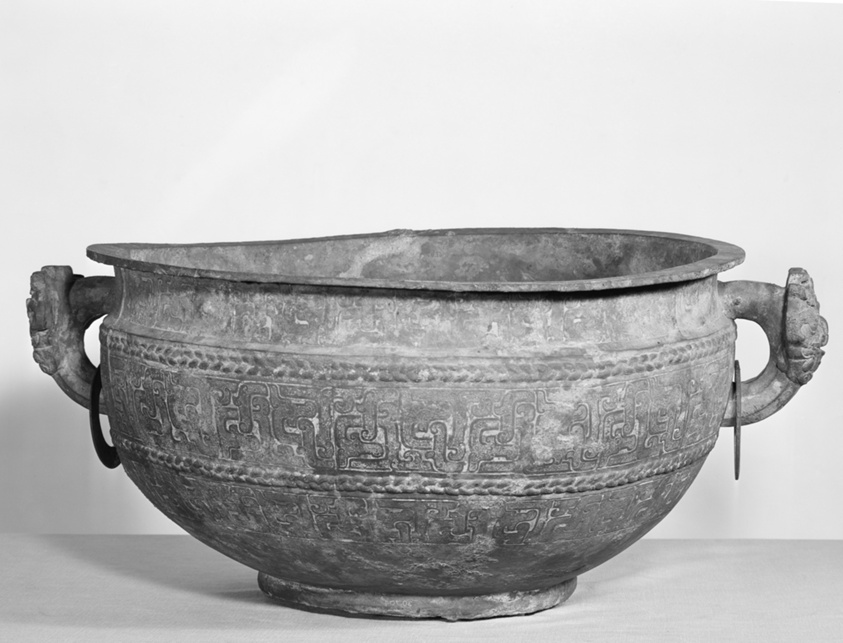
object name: Vessel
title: Water Basin (Jian)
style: Chinese (culture or style)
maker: China; probably from southern Shanxi or northern Henan province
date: Eastern Zhou dynasty (770–256 B.C.), first half of 5th century B.C.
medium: Bronze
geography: China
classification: bronze; metal; vessel; asian art